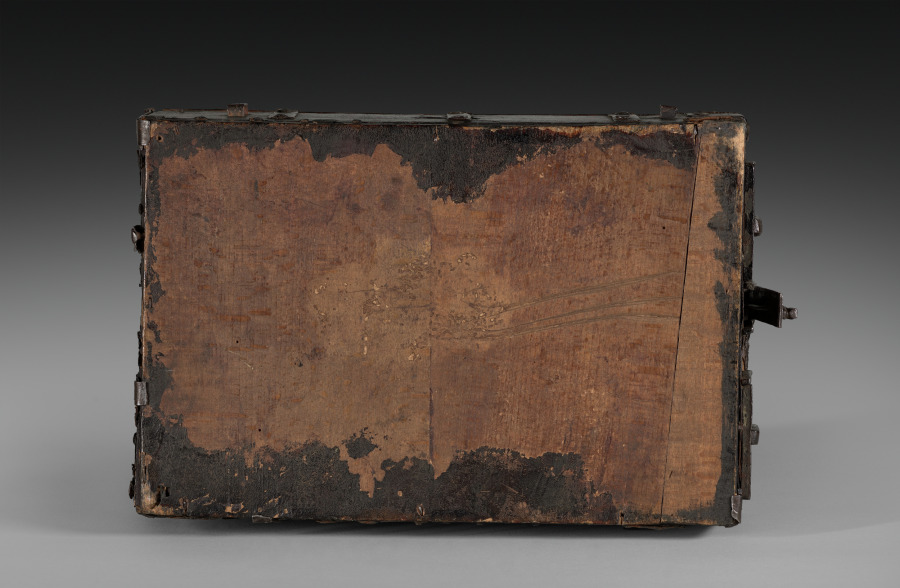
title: Coffret with Woodcut of Saint Veronica's Vernicle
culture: Coffret: France, probably Paris; Woodcut: Germany, Augsburg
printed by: Hans Burgkmair the Elder (German, 1473–1531)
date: Coffret: c. 1515; Woodcut: c. 1509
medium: Wood, leather, iron, textile, woodcut with stenciled coloring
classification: Print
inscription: SALVE. XPI. EFFIGIES. SACERRI[M]A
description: This remarkable object is thought to have functioned as a traveling case to keep small valuables and books, as well as a provisional altar. Made in France around 1515, the interior lid is affixed with a devotional woodcut made in Germany, imported, and colored for the purpose. Featuring an image of the veil of Saint Veronica, the text at the bottom of the woodcut guides the user in prayer to the holy image of Christ’s face which has been miraculously imprinted on the veil, an action that held promise of indulgences (a reduction in one’s punishment for sins). Presumably, the owner carried the box on a journey, retrieved a prayer book from inside, and propped it open in order to practice daily prayers.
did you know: A secret compartment on the top lid of this coffer may have held a relic, consecrated host, or valuable document.